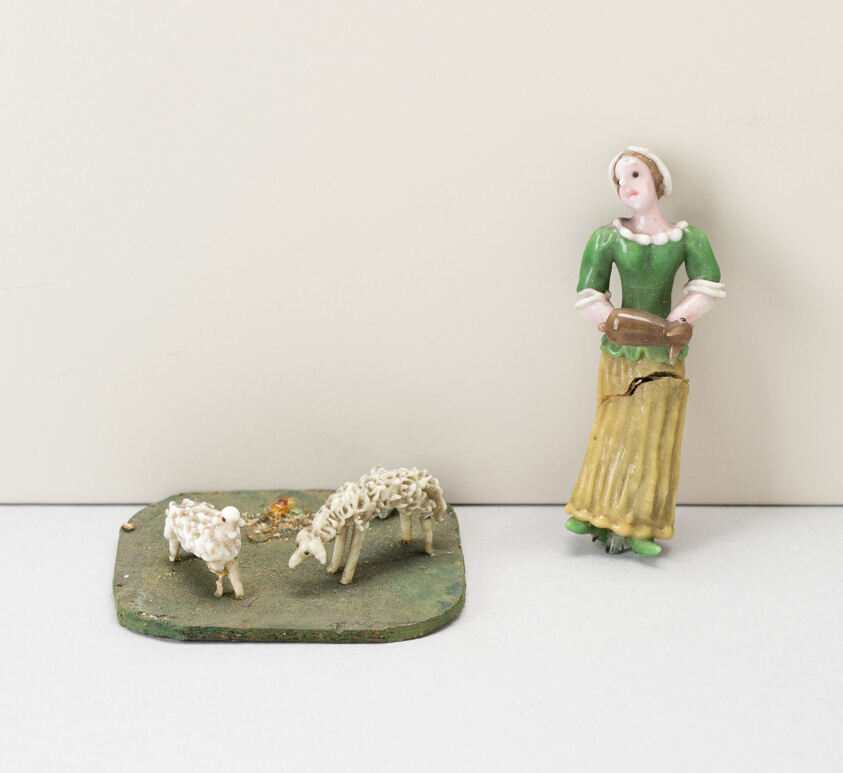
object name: Glass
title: Shepherdess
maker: Nevers, France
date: 19th century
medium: Glass; lampwork (verre de Nevers), metal armature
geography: France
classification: decorative object/ornament; lampwork; glass; european decorative arts